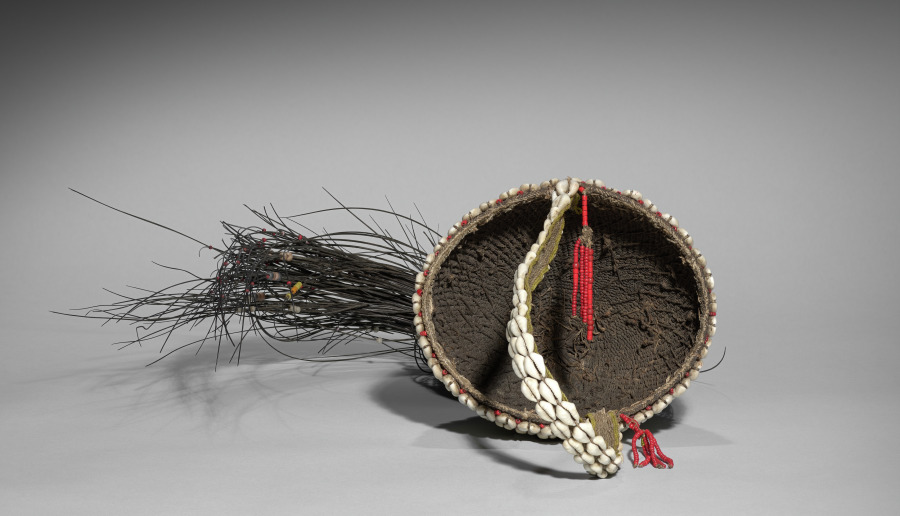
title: Bwami Prestige Cap (Mukuba or Nkumbu)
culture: Africa, Central Africa, Democratic Republic of Congo, Lega-style maker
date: early to mid-1900s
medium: Plant fibers, elephant rawhide and hair, cowrie shells, glass beads, and cord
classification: Garment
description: Hats of different types, sizes, and materials figure prominently in the Lega people’s Bwami association where they indicate status and rank. Cone-shaped hats made of canvas covered with cowrie shells and surmounted by an elephant tail are worn during initiations into kindi, the highest of the five male grades. This prestige cap uses a variety of local and imported materials to show its wearer's importance. The plant fibers that support the hat and the elephant hair were sourced in Central Africa, while the beads and cowrie shells were imported. The beads were made in Europe, while the cowrie shells came from the Indian Ocean region. The might of Bwami members is likened to the elephant’s potentially destructive strength.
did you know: While identified with Africa, cowrie shells were generally imported from the Indian Ocean region. After being collected near the Maldives islands, these Indo-Pacific shells entered parts of Africa via overseas trade routes.